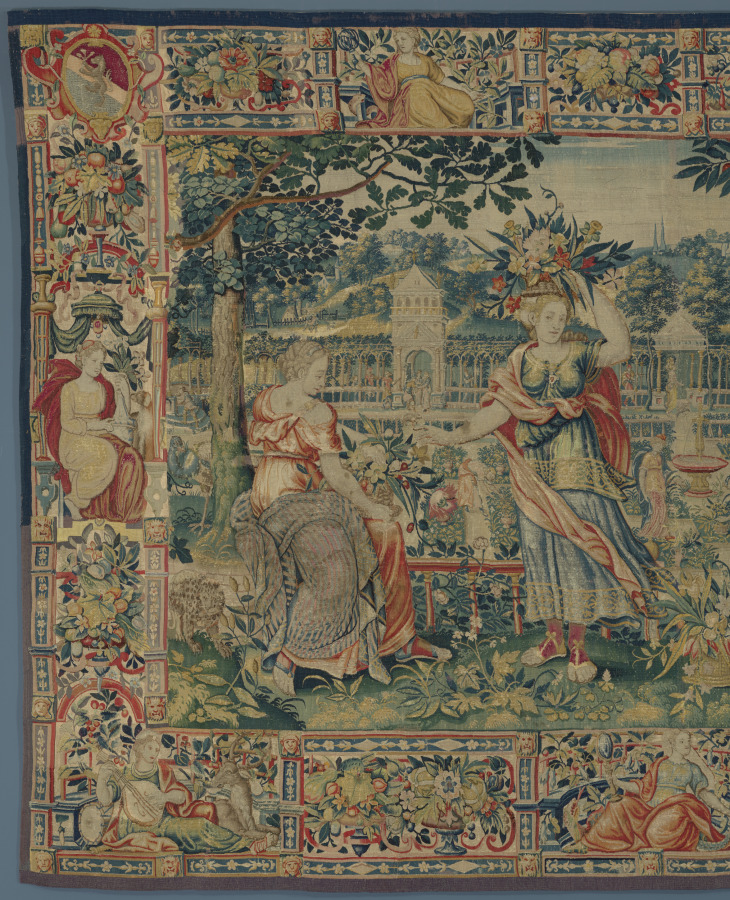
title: Romans Admiring the Sabine Women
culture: Belgium, Brussels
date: 1570–90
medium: silk and wool: tapestry weave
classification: Tapestry